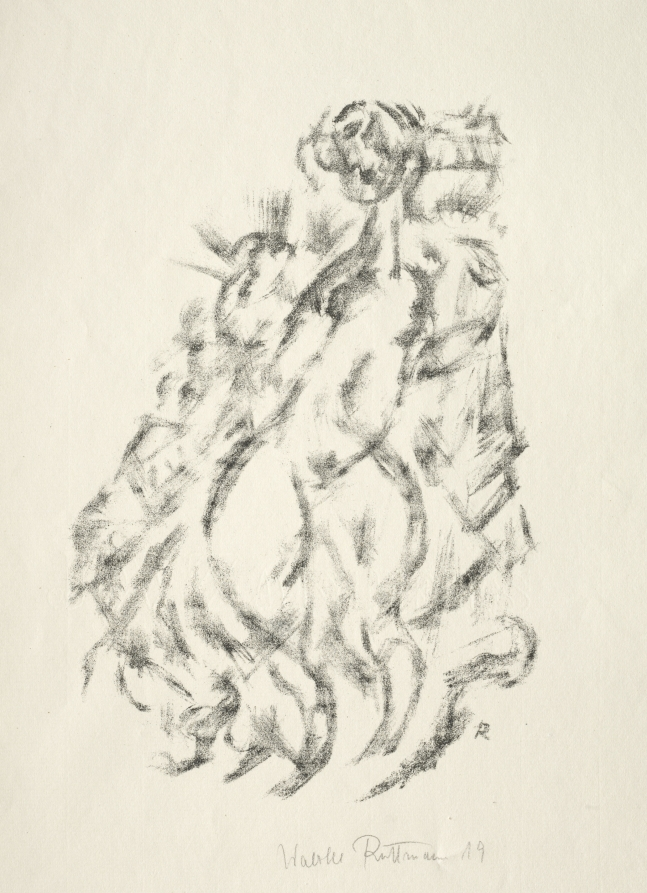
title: The Promenade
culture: Germany, 20th century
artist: Walter Ruttmann (German, 1887–1941)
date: 1919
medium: lithograph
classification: Print